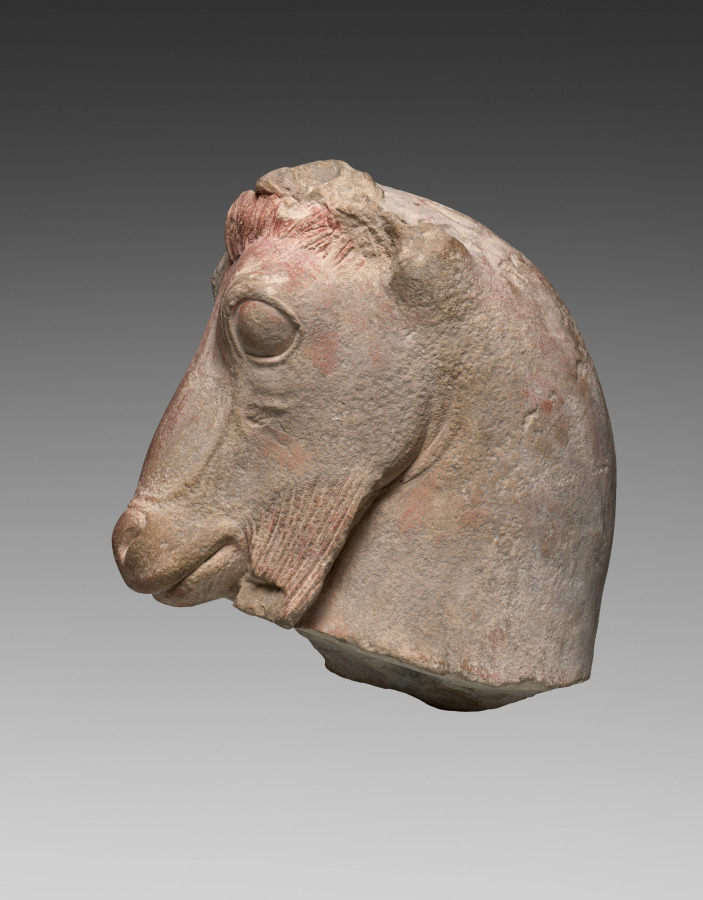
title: Fragment of a Goat's Head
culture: Greece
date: c. 500–475 BCE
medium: limestone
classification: Sculpture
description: Initially identified as a horse head, this fragmentary sculpture, once painted reddish-brown, has a beard, indicating that it depicts a goat. Its large size, however, together with its neck position and unusual round eye, have all prompted questions. Was the head broken from a rearing goat? Or did it represent Pan, the rustic shepherd god often depicted as half-man, half-goat? If Pan, some scholars have connected it with a fifth-century BC Athenian sanctuary erected to thank the god for aid in battle. An alleged provenance near the Athenian Acropolis supported this idea, but scientific tests suggest otherwise.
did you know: Pan, the goat-headed god, is often called a son of Hermes, but sources disagree.